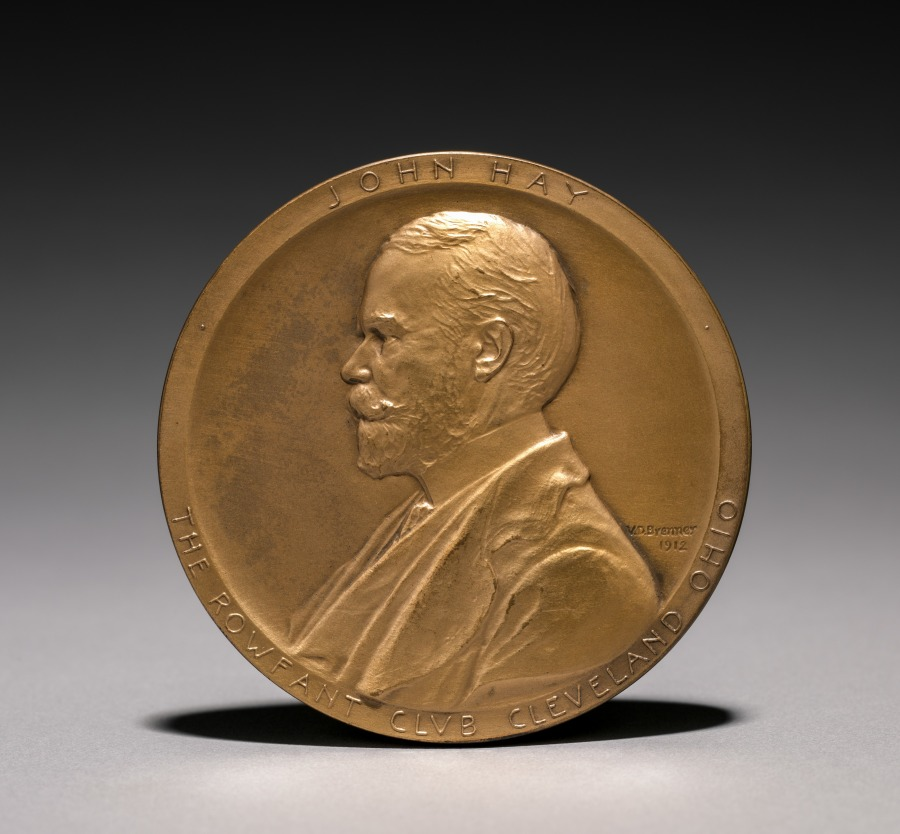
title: John Hay Medal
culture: America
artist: Victor D. Brenner (American, 1871–1924)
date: 1912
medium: bronze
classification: Metalwork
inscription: above: "JOHN HAY"; below: "THE ROWFANT CLVB CLEVELAND, OHIO."